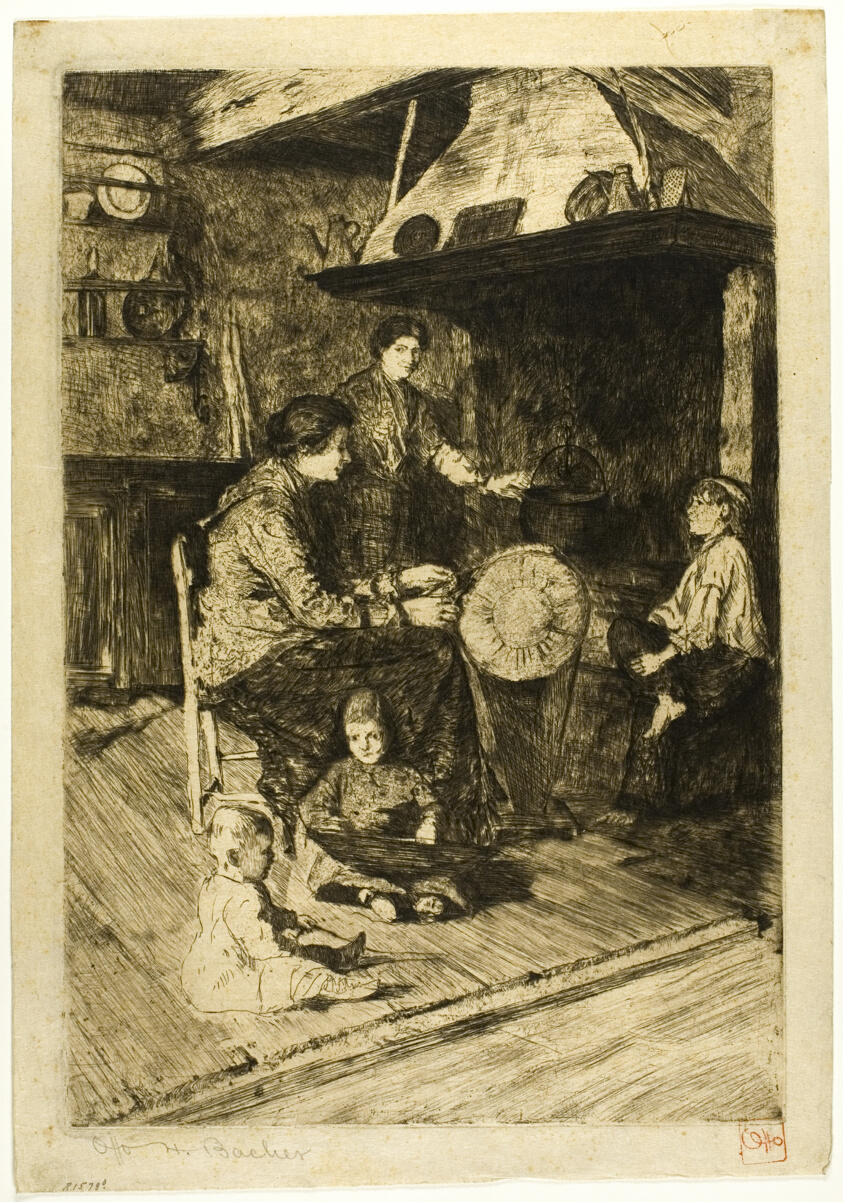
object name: Print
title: The Lace Maker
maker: Otto Henry Bacher (American, 1856-1909)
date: 1880/ 1882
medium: Etching in black on cream laid paper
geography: United States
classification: etching; print; prints and drawing